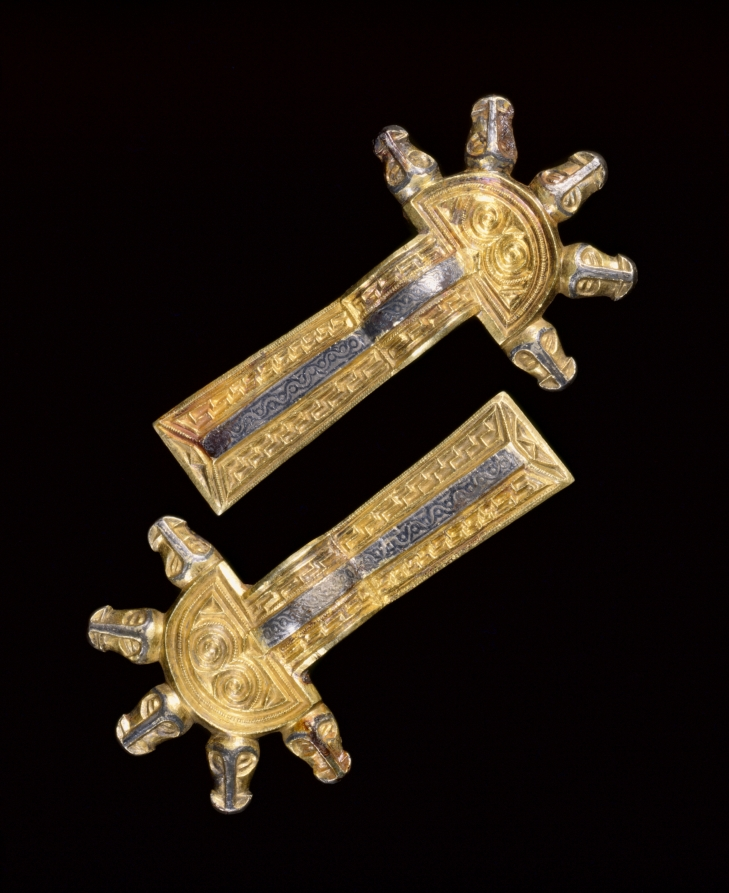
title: Pair of Fibulae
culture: Alemannic, Migration Period, 6th-7th century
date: 500s-600s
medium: cast silver, parcel-gilt, with niello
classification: Jewelry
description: A woman of high rank might have worn these twin fibulae on her shoulders, one fastening her inner garment on the right, the other her outer garment on the left. She might also have suspended them from her belt as decorative ornaments.